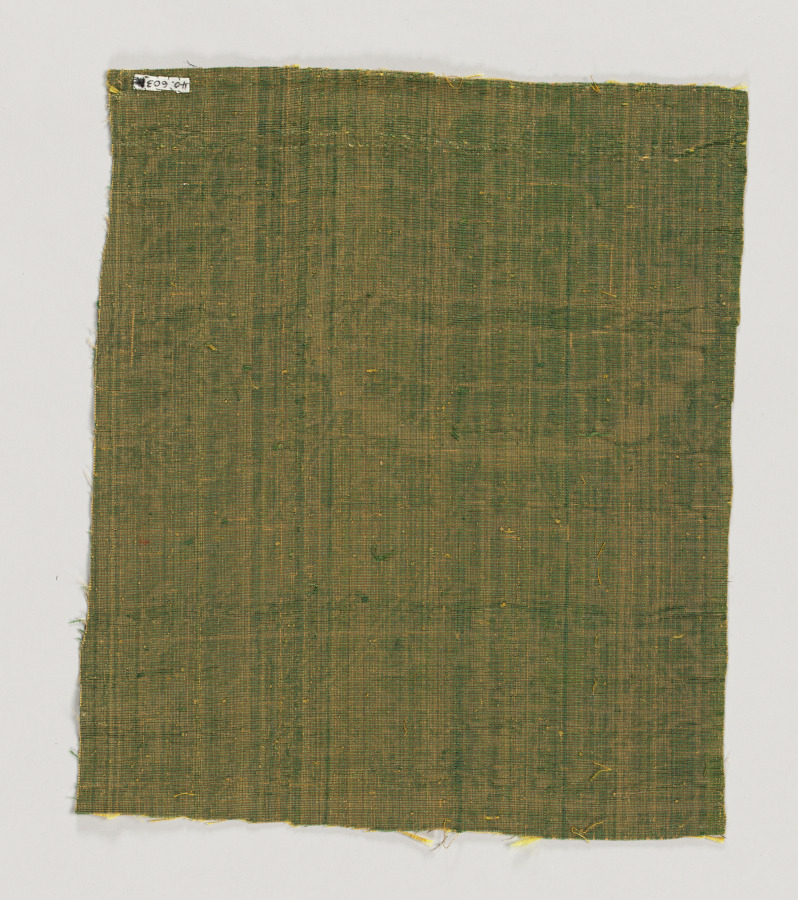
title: Velvet Fragments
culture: Spain, early 16th century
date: early 16th century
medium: velvet (cut, voided, and brocaded): silk and gold thread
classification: Velvet